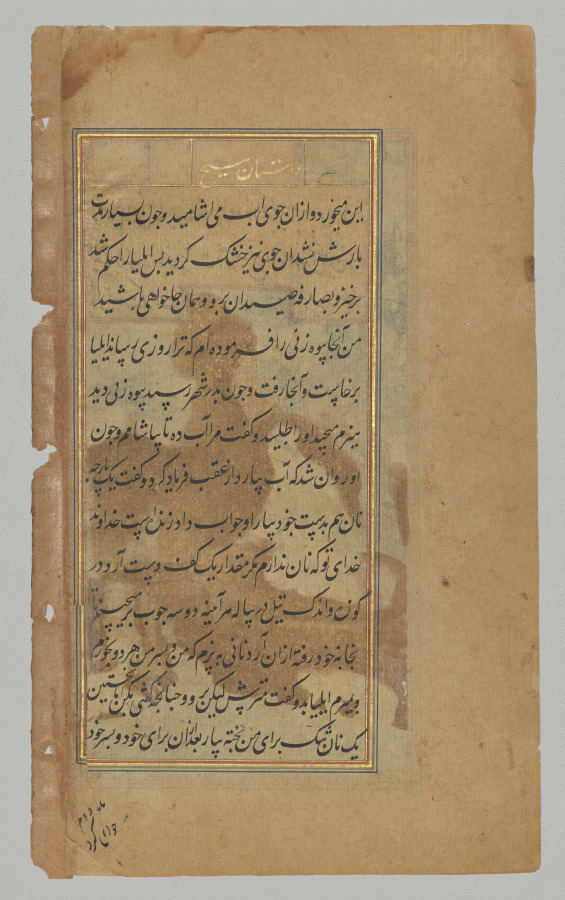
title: A raven brings food to Elijah (folio 72 recto), from a Mirror of Holiness (Mir’at al-quds) of Father Jerome Xavier,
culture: Mughal India, Allahabad, made for Prince Salim (1569–1627)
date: 1602–4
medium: Gum tempera, ink, color, and gold on paper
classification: Manuscript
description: The Old Testament prophet Elijah sits like an Indian holy man on a raised rocky platform under a tree. A raven has come to bring him bread and meat until the river runs dry, as commanded by God. Father Jerome recounted the story of Elijah to explain a reference made by Jesus in the context of his being rejected by the people of Nazareth, where he grew up. The unusual combination of Elijah’s salmon pink and light blue garments draws the viewer’s attention to him as the focus of the composition and echoes the paler hues of the sky.